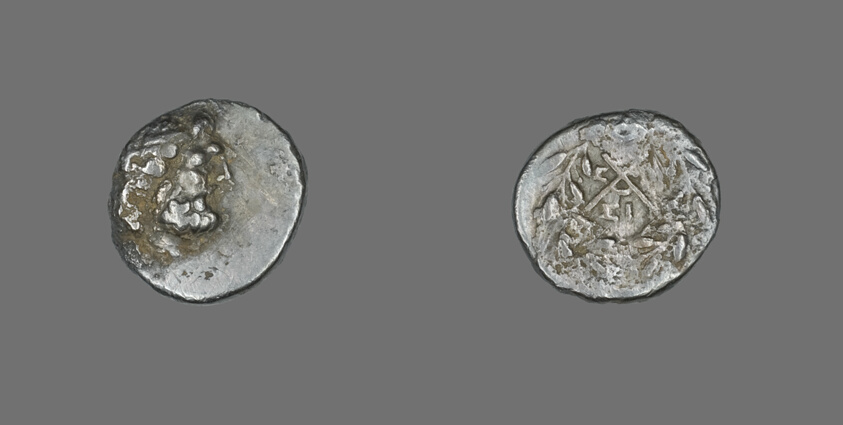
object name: Coin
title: Hemidrachm (Coin) Depicting the God Zeus Amarios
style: greek, ancient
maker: Greek, minted in Sicyonia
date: 151-146 BCE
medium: Silver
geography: Ancient Greece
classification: coin; ancient art